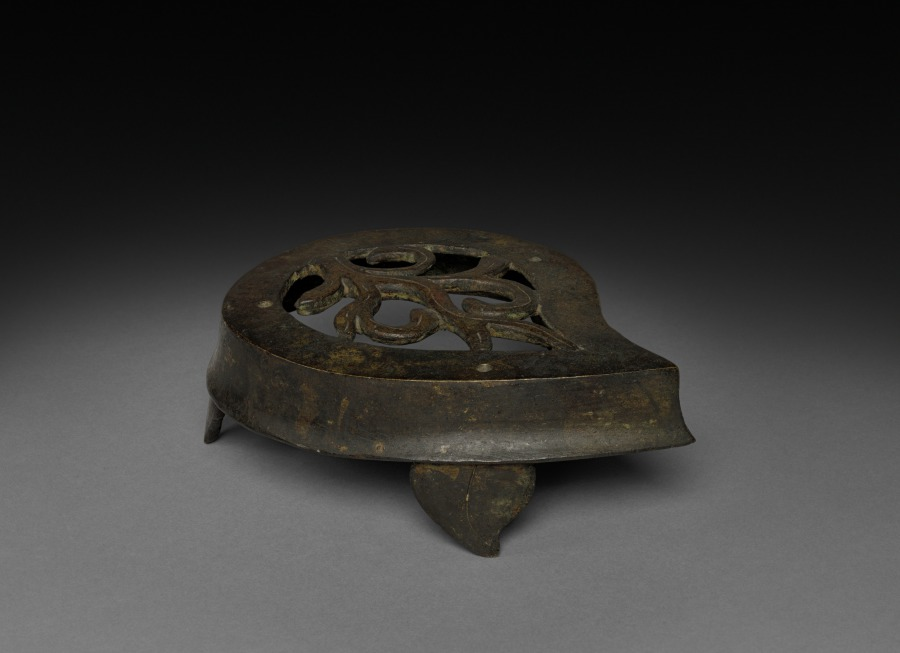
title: Leaf-shaped Trivet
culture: Japan, Meiji period (1868–1912) to Taishō period (1912–26)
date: early 1900s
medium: iron (?)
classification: Metalwork